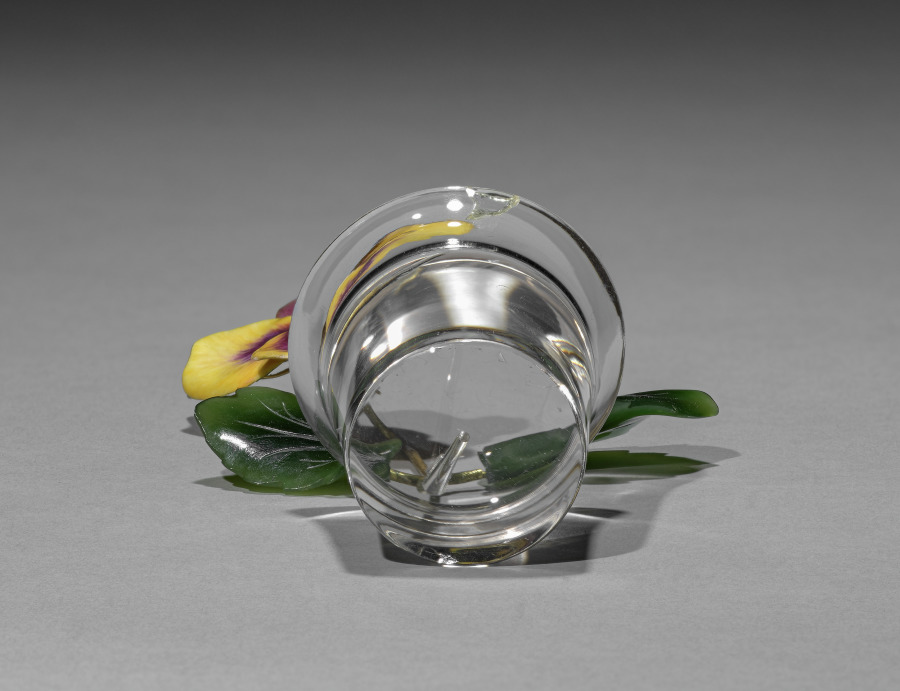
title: Flower Study of a Pansy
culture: Russia, St. Petersburg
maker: House of Fabergé (Russian, 1842–1918)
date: c. 1885–1915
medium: gold, jade, enamel, rock crystal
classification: Miscellaneous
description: This flower study depicts a pansy in bloom. Fabergé’s inspiration for his flower studies is said to have come from the floral brooches of precious stones that were made in the 1700s for Catherine the Great as well as from the Japanese art of flower arranging, known as ikebana. Small and delicate, Fabergé’s flower studies were given as intimate gifts to friends by the tsarina and others in the court. She also liked to take them around to wherever the imperial family was residing as a reminder of spring during the harsh Russian winters.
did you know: The stems of Fabergé’s flower studies are set into little basins carved from rock crystal to resemble pots of water.